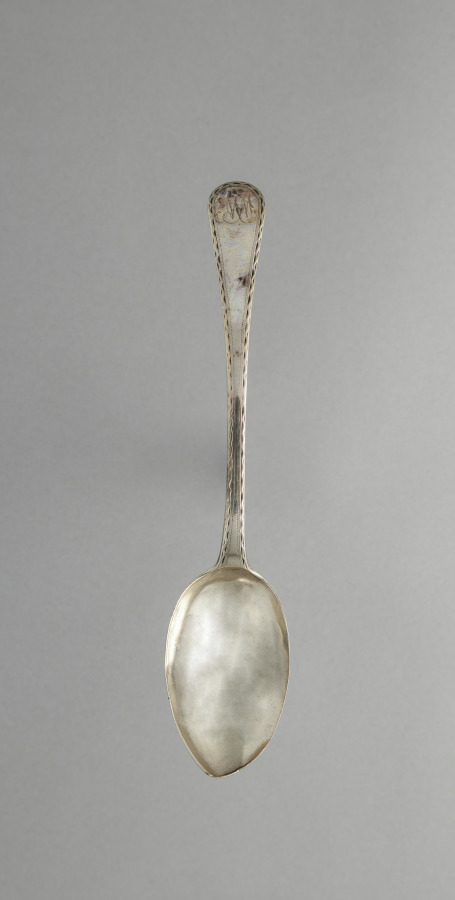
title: Tablespoon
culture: America, Massachusetts, Boston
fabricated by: Paul Revere II (American, 1735–1818)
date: c. 1785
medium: silver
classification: Silver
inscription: engraved: "MM" in bright-cut script on top of handle end.